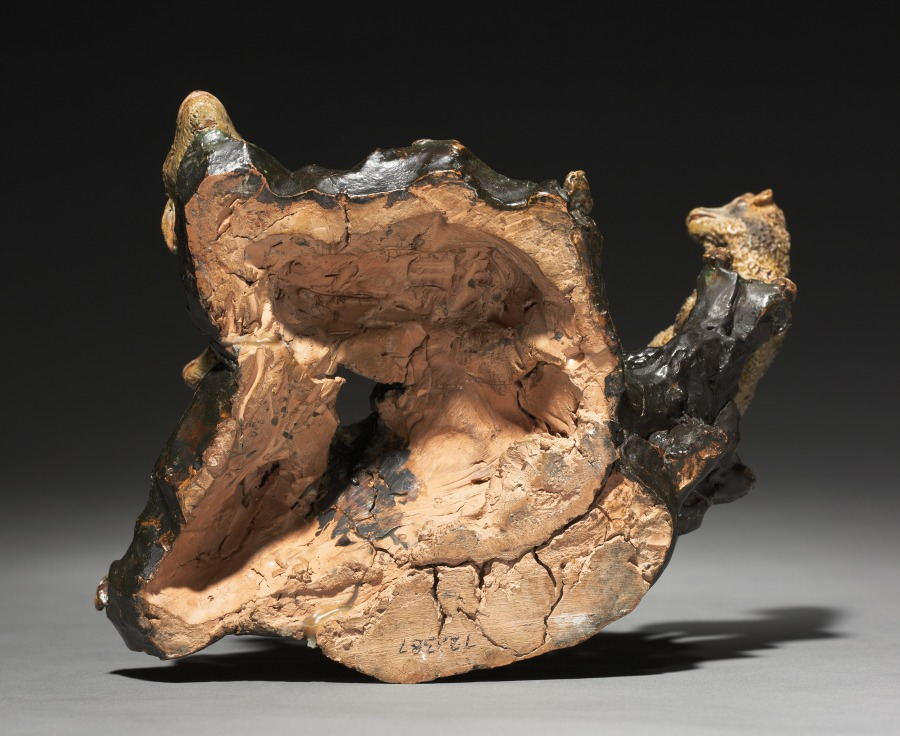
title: Figure from a Crèche: Group of Four Sheep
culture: Italy, Naples, late 18th-early 19th century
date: 1780–1830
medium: painted terracotta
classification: Sculpture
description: The practice of creating scenes of the Nativity for the home dates from the early 1700s in Italy, where people began to set up doll-like figures of about a foot or less in height. The custom was particularly popular in Naples around 1800, where crèche scenes (crèche means cradle, or crib) included many figures, whose heads and hands of painted terracotta, stuffed cloth bodies, and clothing adapted from contemporary local costumes gave them an amazingly realistic character. Representations of the birth of Jesus can be traced to the first few centuries of Christianity. Both living creatures and sculptural depictions of them were used from early times. By the late middle ages it was customary to create life-size figures of wood or stone, naturalistically painted, to represent the characters who participated in the events of Jesus's early life. These sculptures were then arranged in scenes illustrating one or both of the most important of these events, the Adoration of the Shepherds and the Adoration of the Magi-the three kings from the East who came to pay homage to the Christ child. Used in churches, these large figures were especially popular in Italy, Central Europe, Spain, and Portugal.